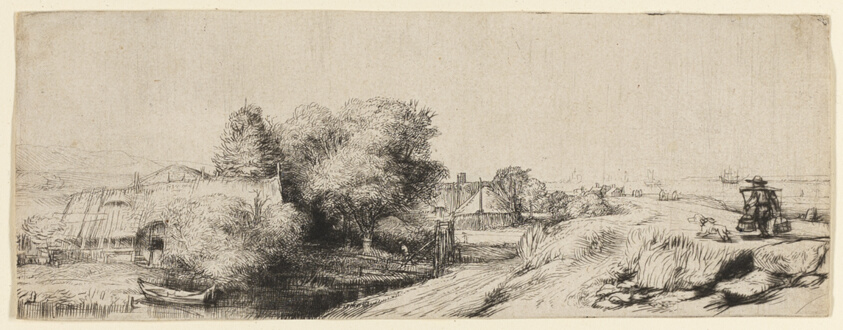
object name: Print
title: View of the Diemerdijk with a Milkman and Cottages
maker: Rembrandt van Rijn (Dutch, 1606-1669)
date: c. 1650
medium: Etching with drypoint in black on cream laid paper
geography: Holland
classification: etching; print; prints and drawing; paper; drypoint